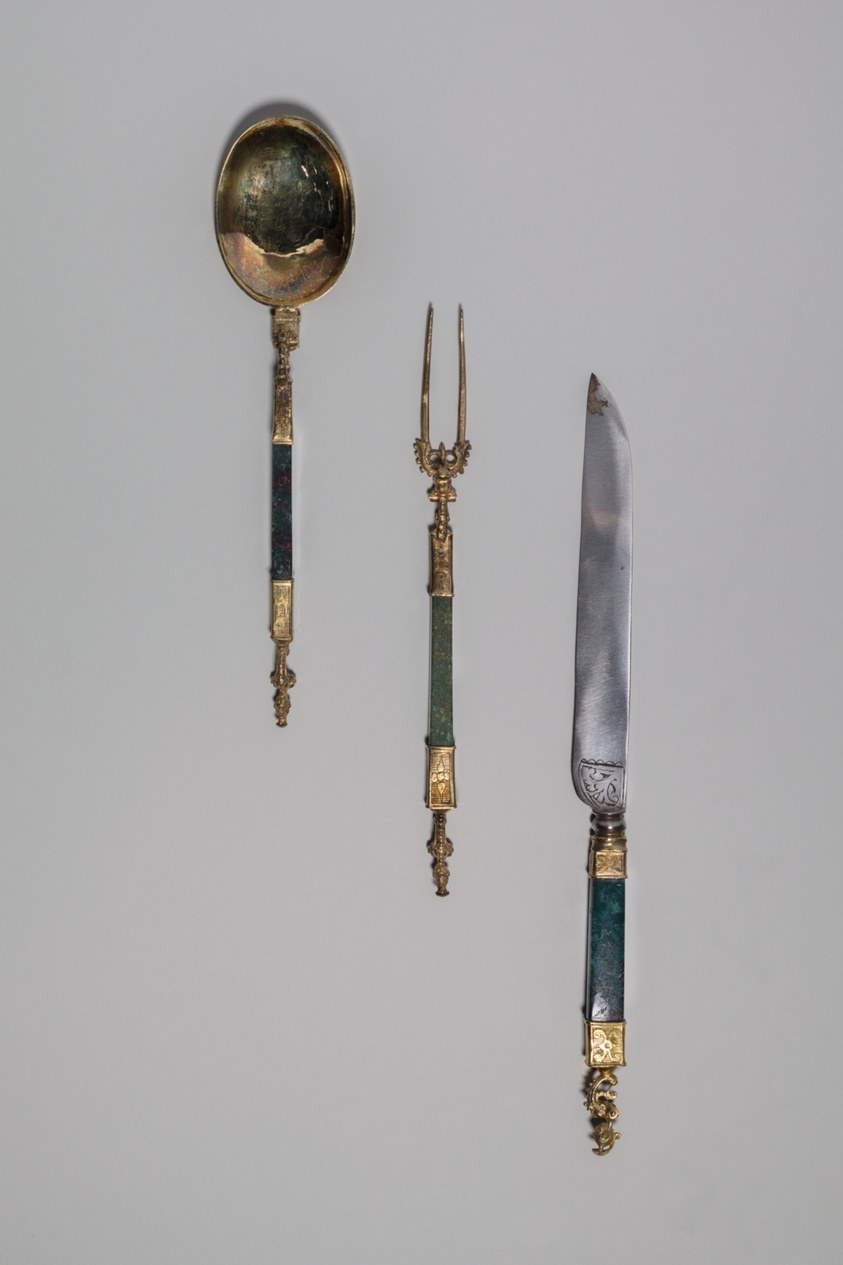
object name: Metalwork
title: Fork, Knife, and Spoon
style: Mannerism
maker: Southern Germany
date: c. 1600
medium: Bloodstone (Heliotrope), silver, gilding, and steel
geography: Southern Germany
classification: cutlery; spoon; decorative arts; metalwork; fork (flatware); knife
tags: dining, dinnerwear, Germany, goddesses, helmets, minerva